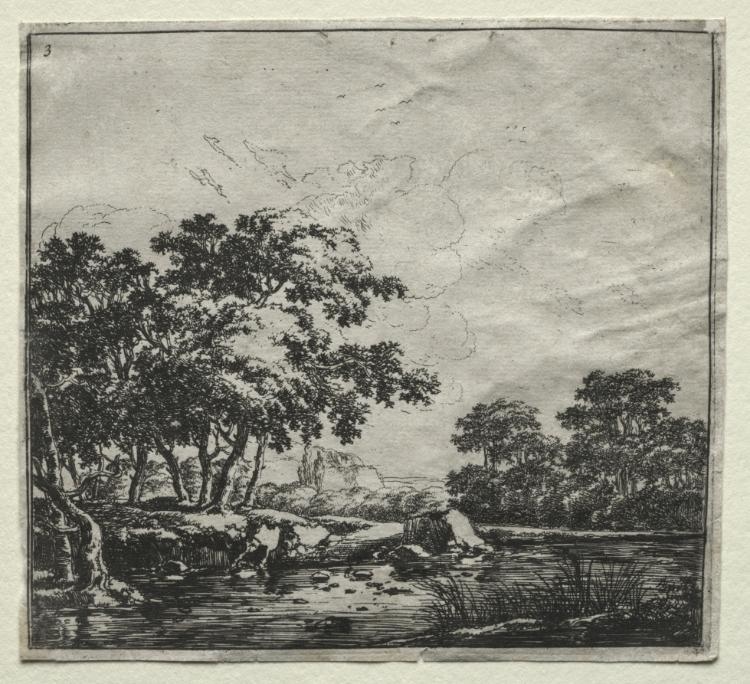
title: The River near the Woods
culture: Flanders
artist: Herman Naiwincx (Flemish, c. 1624–after 1651)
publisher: Clement de Jonghe (Dutch, 1579–1679)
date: 1640–51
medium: etching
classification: Print